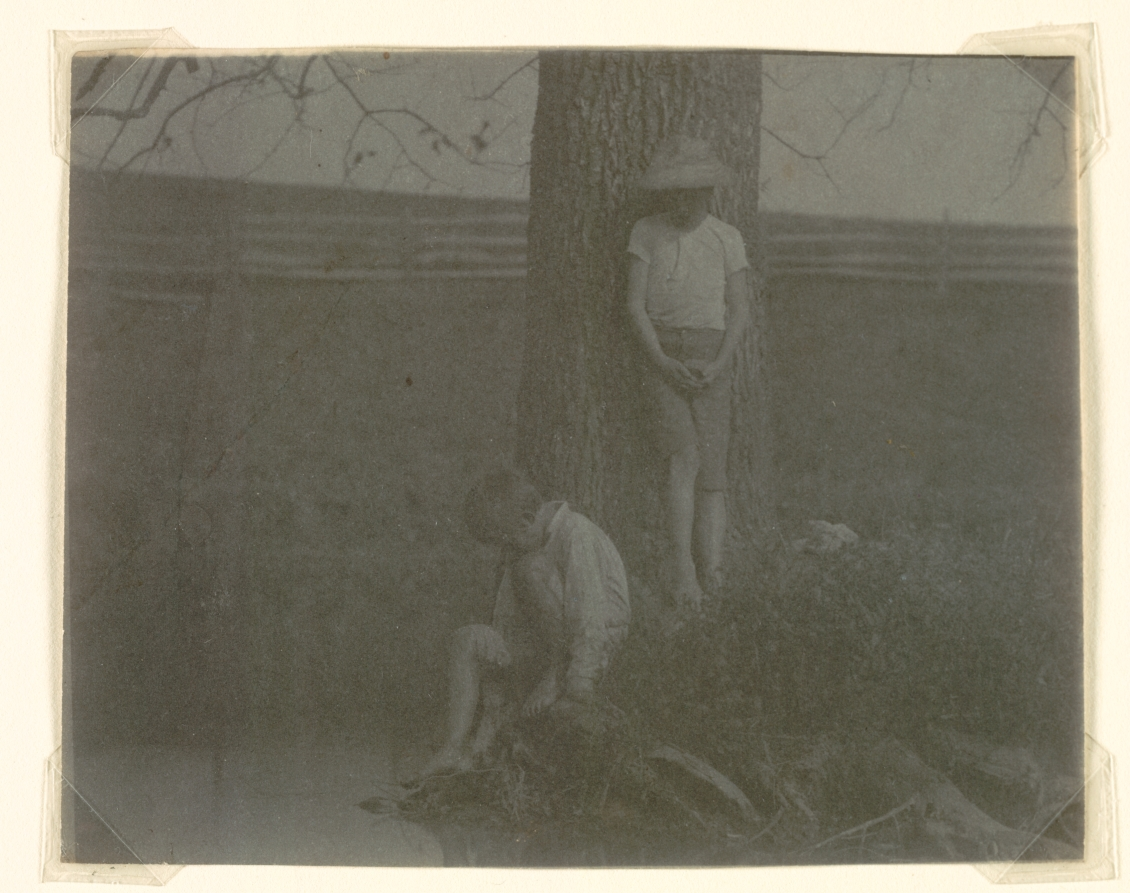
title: Crowell Children at Avondale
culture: America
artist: Thomas Eakins (American, 1844–1916)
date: 1885–1890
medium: platinum print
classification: Photograph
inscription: written in pencil on verso: "94" "Two of Eakins nephews in Avondale, Pa (1885-90) platinum print"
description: Thomas Eakins's awareness of photography as a visual aid for painters preceded his own interest in making photographs, which began in the early 1880s. He fully expressed his pioneering, personal, and aesthetic style of photography in this rare image of two young boys in an outdoor setting. Here, Eakins positioned his nephews against a muscular tree trunk, which asymmetrically divides the composition. He made the short exposure in diffuse outdoor lighting, a condition he favored. Soft shadows allowed for a subtle rendering of the ordinary scene, marked by casual posture, dress, and setting. An early practitioner of the platinum process, Eakins was instinctively drawn to its slight gradations and gentle continuities of tone. Broad areas of light and shade allowed him to ignore specific details in order to render the universal qualities he discovered through close observation of his chosen subject matter.